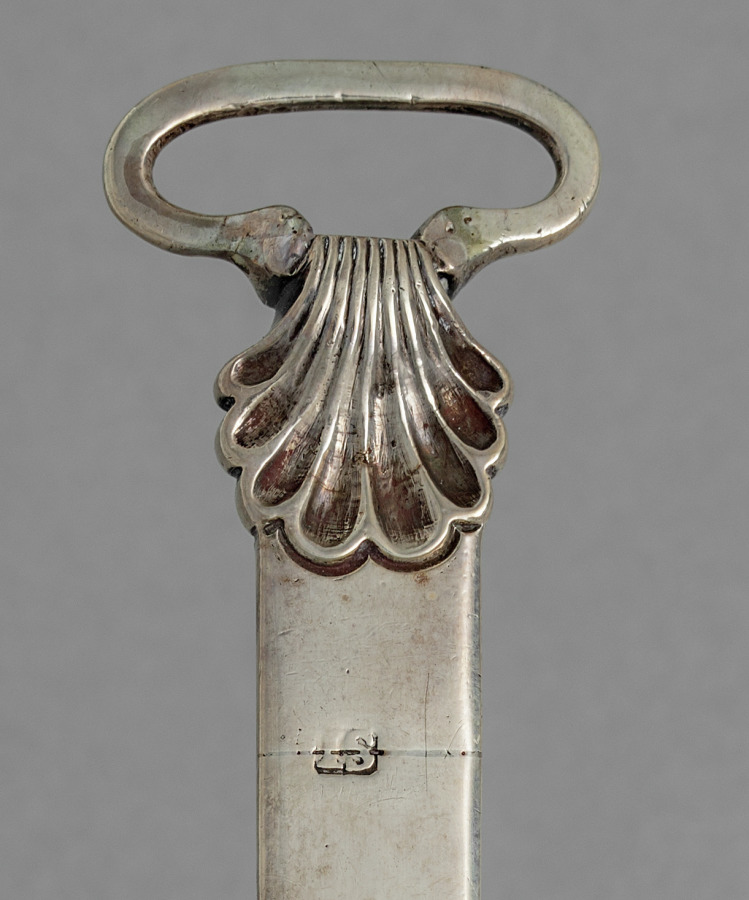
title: Skewer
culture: England, 18th century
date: 1700s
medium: silver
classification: Silver